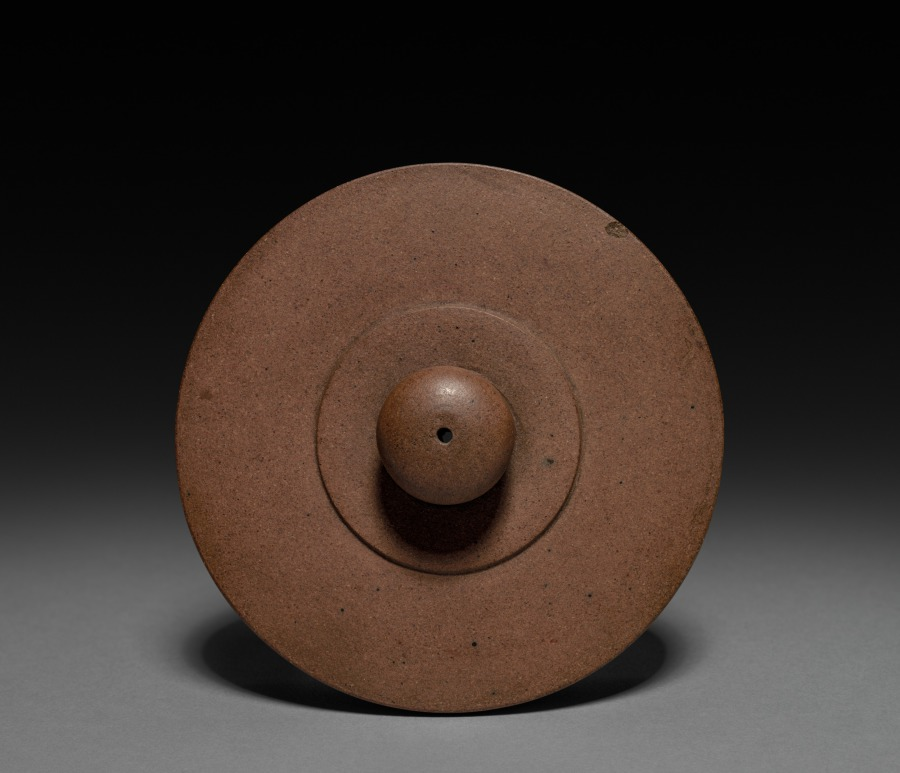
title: Teapot: Yixing ware (lid)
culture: China, Qing dynasty (1644-1911)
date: 1644–1911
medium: stoneware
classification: Ceramic